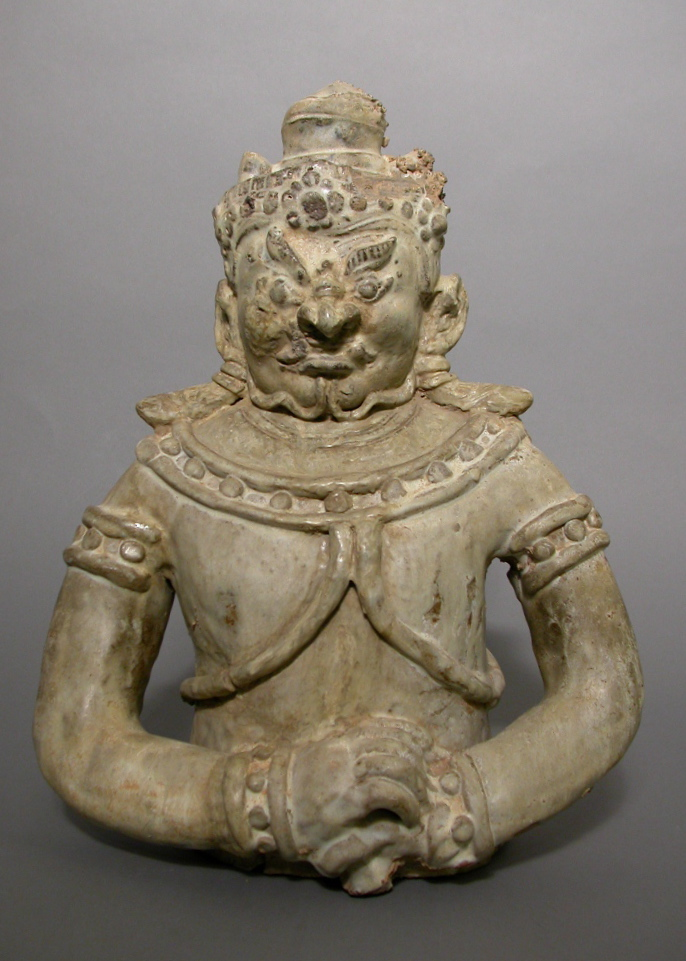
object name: Sculpture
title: Temple Guardian (Rakshasa)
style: Southeast Asian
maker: Thailand; Sukkhotai province, Si Satchanalai, Sawankhalok Kilns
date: 14th/15th century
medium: Terracotta with a cream-colored glaze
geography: Thailand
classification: sculpture; asian art